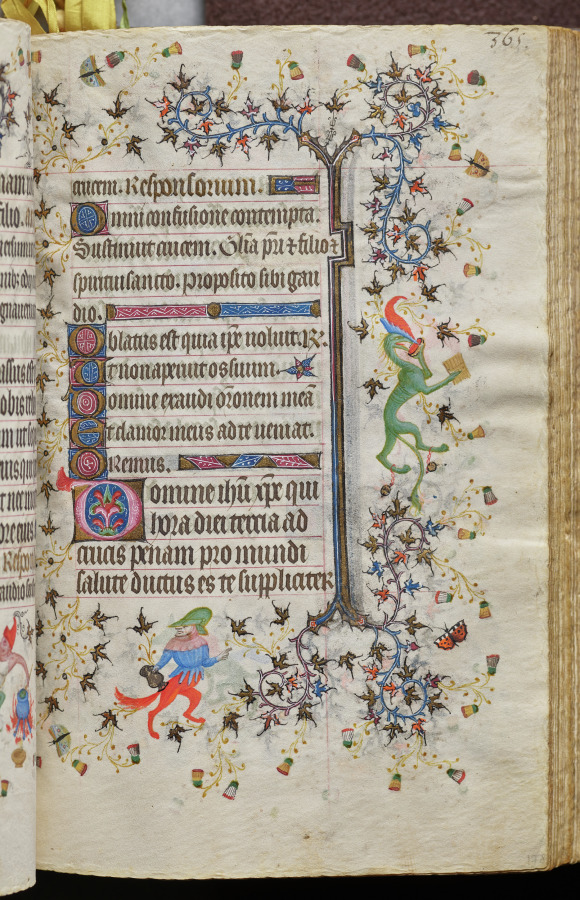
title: Hours of Charles the Noble, King of Navarre (1361-1425): fol. 178r, Text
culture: France, Paris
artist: Master of the Brussels Initials and Associates (French)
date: c. 1405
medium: ink, tempera, and gold on vellum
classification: Bound Volume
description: This precious volume was obviously highly prized by its owner, the French-born King of Navarre, who had his coat of arms painted on no less than twenty folios. Rather than directly commissioning this manuscript from a specific workshop, it seems that Charles the Noble acquired his book of hours -- perhaps ready-made for the luxury market -- while on a trip to Paris in 1404-05. A collaborative effort, six painting styles are evidenced within the pages of this codex, those of two Italians, two Frenchmen, and two Netherlanders. The painter who was responsible for the planning and decoration of the book, and who produced seventeen of the large miniatures, was a Bolognese artist known as the Master of the Brussels Initials. His principal assistant, responsible for most of the borders, was a Florentine who signed his name "Zecho" da Firenze on folio 208 verso.